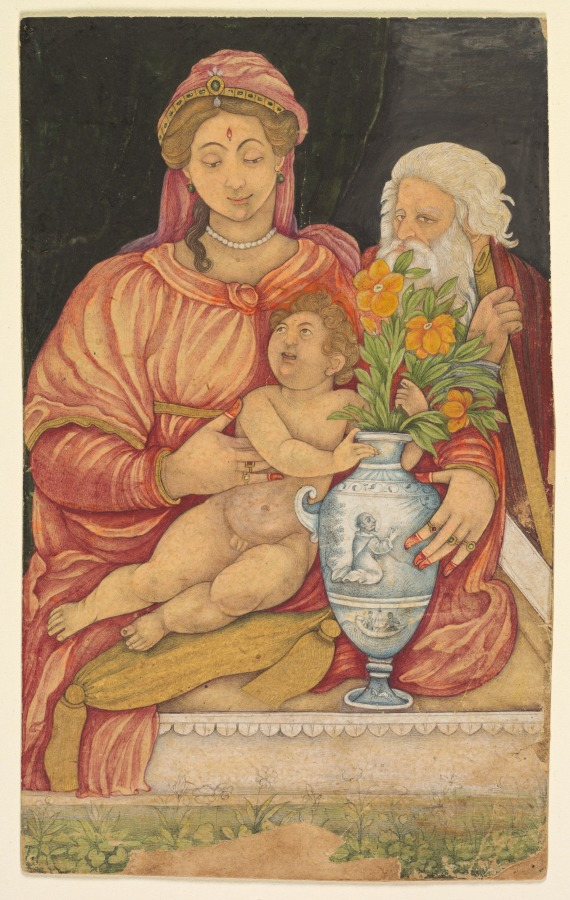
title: The Holy Family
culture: Northern India, Mughal court, early 17th century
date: c. 1620s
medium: Gum tempera and gold on paper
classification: Painting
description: This painting of Joseph, the Virgin Mary, and the infant Jesus is based on European sources, but it also contains several details that are specifically Indian. For example, although Mary is dressed in classical European-style robes, she is adorned with jewelry of rubies and emeralds, the preferred gems of Mughal royalty. Her fingertips are also red with henna, and she wears a bindi on her forehead. The detailed rendering of the vase evokes the Catholic St. Francis as well as Indian worship of the sun. The vessel itself points to the appreciation of Chinese blue-and-white ware imported from imperial Ming-dynasty kilns to the court of Jahangir (reigned 1605–27).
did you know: With hennaed fingertips Mary holds the vase so baby Jesus doesn’t tip it over.